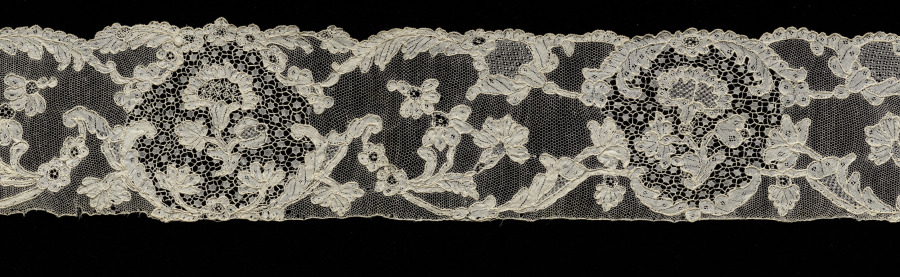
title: Lace Edging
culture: France, Alençon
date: 1700s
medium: Linen: needle lace (Point d'Alençon)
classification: Lace